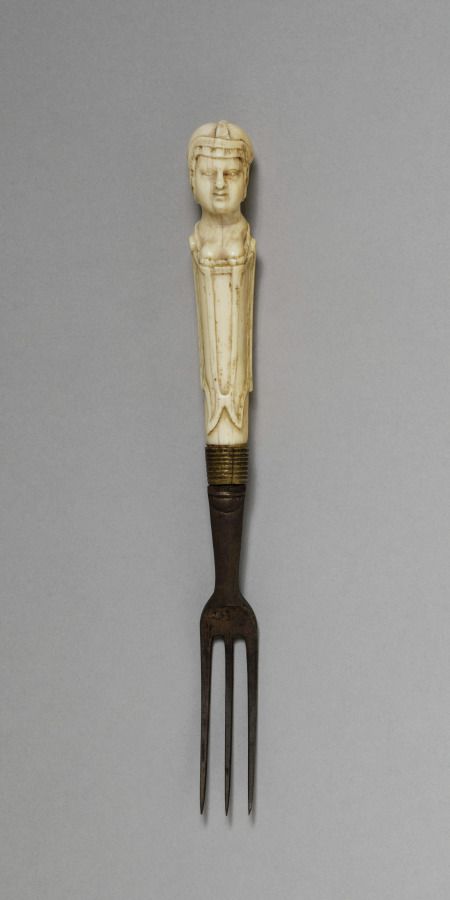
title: Fork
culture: Italy, 18th century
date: 1700s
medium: metal end, ivory handle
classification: Ivory